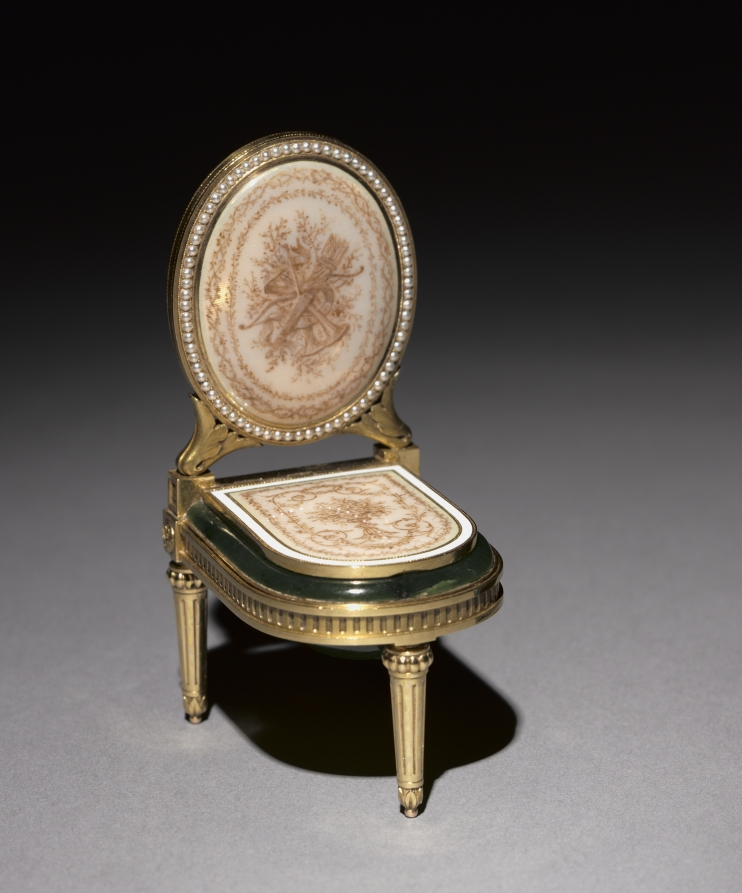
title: Miniature Bathroom Chair (Bidet)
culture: Russia, St. Petersburg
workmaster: Henrik Wigström (Russian, 1862–1923)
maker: House of Fabergé (Russian, 1842–1918)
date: 1908–17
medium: gold, nephrite, enamel, pearls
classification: Miscellaneous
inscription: Kokoshnik, 72, lower case alpha; 72; H.W. [initials of worksmaster Henrik Wigström]; Fabergé; 25256 [scratched].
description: The giving of small precious objects as intimate gifts between family members within the imperial court was spurred by the House of Fabergé's seemingly endless supply of bejeweled utilitarian objects decorated as expensively as possible, such as this stamp moistener disguising as an exquisite miniature bathroom chair (bidet) in the Louis XVI taste of the late 1700s.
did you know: The seat of this miniature bathroom chair cleverly opens to reveal a small compartment probably containing a damp sponge or ball of cotton to moisten stamps on a desk.